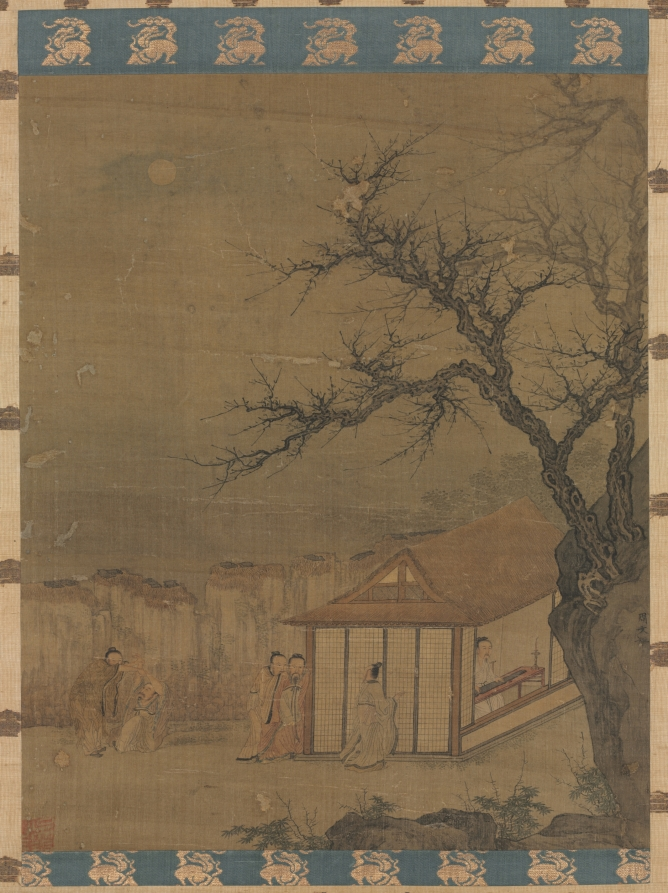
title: Listening to the Qin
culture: China, Ming dynasty (1368–1644)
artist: attributed to Tang Yin (Chinese, 1470–1523)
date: late 1400s–early 1500s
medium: hanging scroll; ink and light color on silk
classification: Painting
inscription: Artist's seal at lower left corner: Wu [remainder cut off].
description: The painting alludes to a legendary incident from the life of Ji Kang 嵇康 (AD 223–262), a guqin player who belonged to a group of 3rd-century eccentric intellectuals. Ji Kang is known as the author of a Guangling San (廣陵散; Melody from Guangling), a composition for the guqin so haunting that it aroused spirits to visit him. The painting depicts the moment when one of the spirits––disguised as a human––is helped by another to emerge from the ground, while others are drawn to the musician playing in his cottage under the full moon.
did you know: The painting is mounted in a Japanese-style three-tier format with futai.